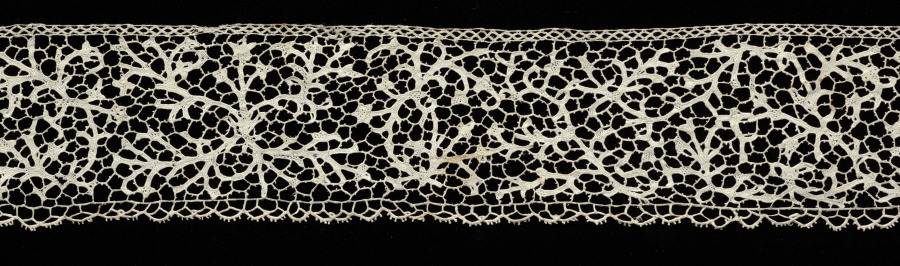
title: Lace Edging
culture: Italy, Venice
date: 1660–99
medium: Needle lace (Coralline Point)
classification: Lace